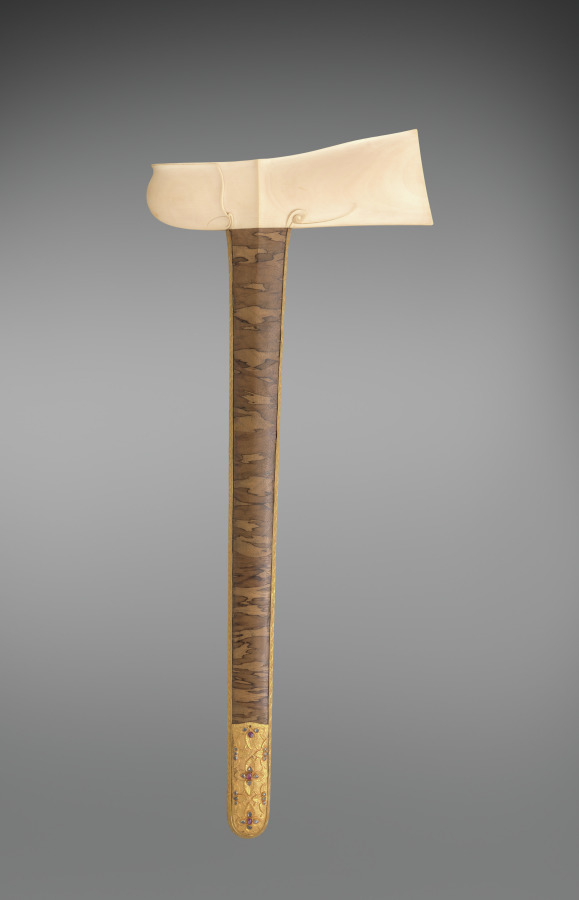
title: Scabbard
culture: Indonesia, Bali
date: 1800s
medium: metal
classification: Arms and Armor